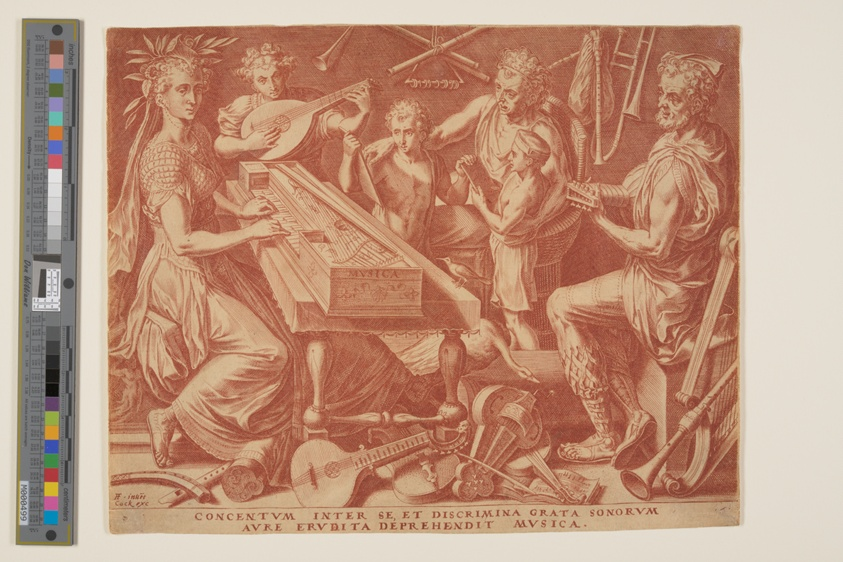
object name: Print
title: Music from The Seven Liberal Arts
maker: Cornelis Cort (Netherlandish, 1533–before 1578); after Frans Floris I (Netherlandish, 1519/20–1570)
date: 1565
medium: Engraving in red on ivory laid paper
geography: Netherlands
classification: print; paper; prints and drawing; engraving